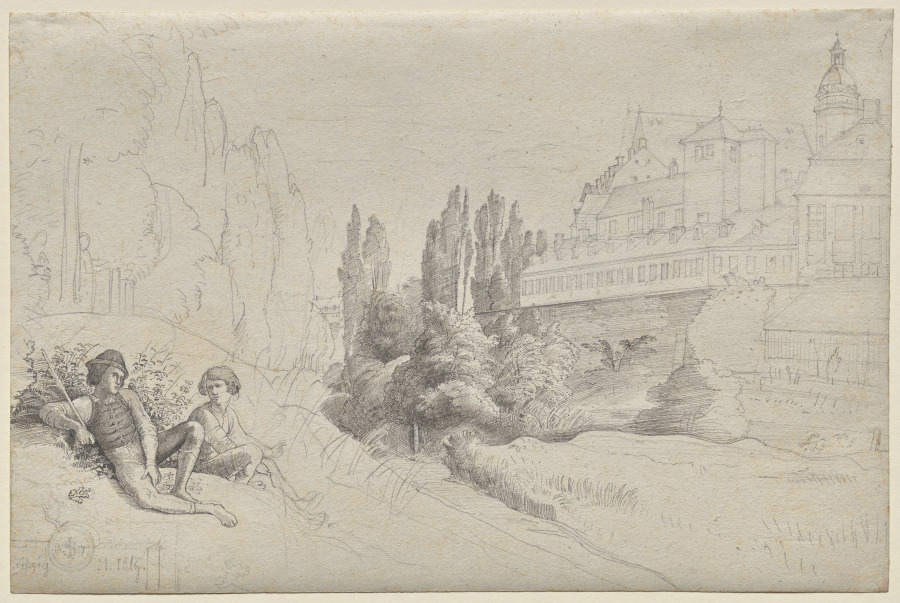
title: View across the Moat towards the Thomasschule and the Thomaskirche in Leipzig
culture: Germany, 19th century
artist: Julius Schnorr von Carolsfeld (German, 1794–1872)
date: 1817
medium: Pen and black ink and graphite on ivory wove paper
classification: Drawing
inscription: Inscribed and dated at lower left: Leipzig 1817 M. July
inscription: stamped at lower right on verso in blue ink: mark of Carl Heumann collection (Lugt 2841a)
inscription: watermark: H * O S E R [unidentified]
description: Julius Schnorr von Carolsfeld belonged to the Nazarenes, a group of artists who looked to early Northern Renaissance art for its simplicity and piety. The artist created this drawing during a visit to his native Leipzig en route to join the Nazarenes in Rome. He depicted the city’s distinctive features, including the oldest German language school in Europe (of which he was an alumnus) and a church where Johann Sebastian Bach served as cantor during the 18th century. The artist himself appears in a self-portrait at right in the pair seen at lower left. He juxtaposed loosely sketched landscape with areas of profuse detail, created with a hard and sharpened pencil reinforced with pen and ink.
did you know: The landscape in this drawing is seen from the perspective of Schnorr von Carolsfeld’s family home in Leipzig.